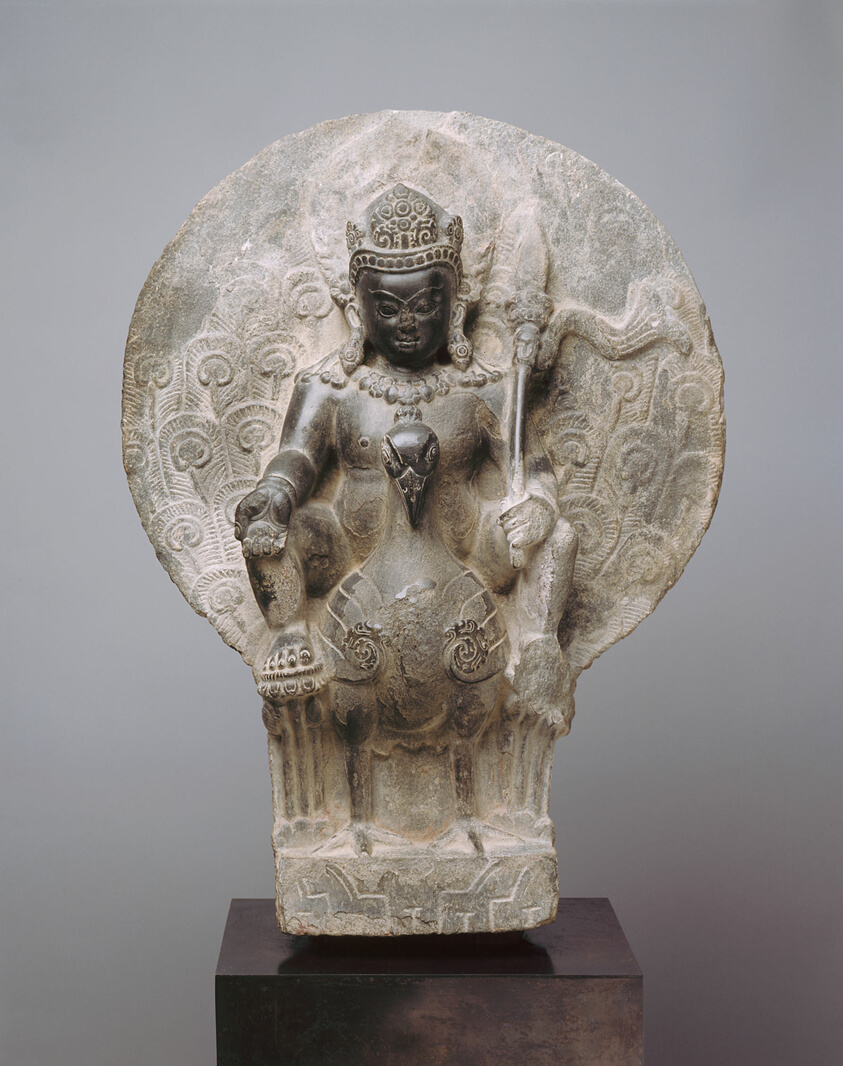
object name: Sculpture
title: Kumara, the Youthful God of War on his Peacock Mount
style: Himalayan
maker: Nepal; Kathmandu Valley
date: 8th/9th century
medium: Gray schist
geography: Kathmandu Valley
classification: sculpture; schist; stone; asian art